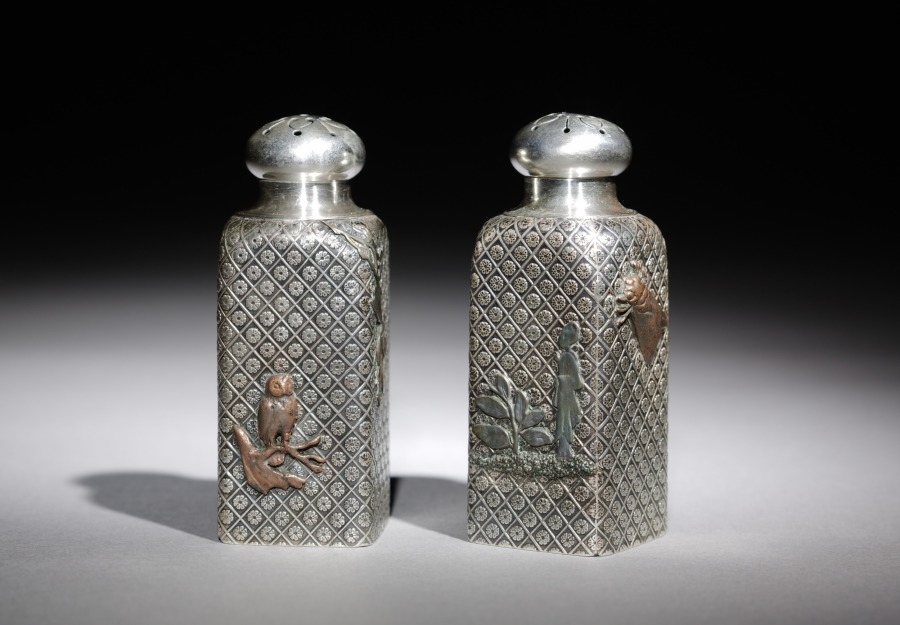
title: Salt and Pepper Shakers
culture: America, Rhode Island, Providence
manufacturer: Gorham Manufacturing Company (America, est. 1831)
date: c.1875–85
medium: silver and mixed metals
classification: Silver